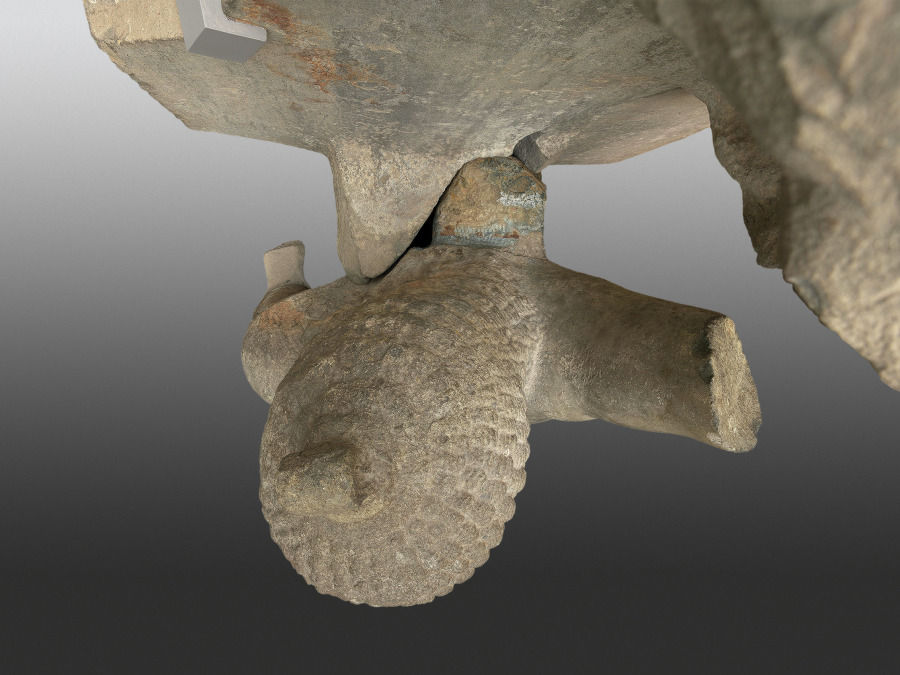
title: Krishna Lifting Mount Govardhan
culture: Southern Cambodia, Takeo Province, Phnom Da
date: c. 600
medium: Sandstone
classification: Sculpture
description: This masterwork of early Cambodian sculpture shows the Hindu god Krishna effortlessly holding aloft a mountain to protect his fellow villagers and herds from torrential storms sent by a jealous old god. It is one of eight monumental monolithic figures recovered from a two-peaked mountain in the floodplains of the Mekong River delta, on the outskirts of the ancient urban center of Angkor Borei.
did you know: Gold earrings were once fastened to the sculpture using holes in the figure's earlobes.